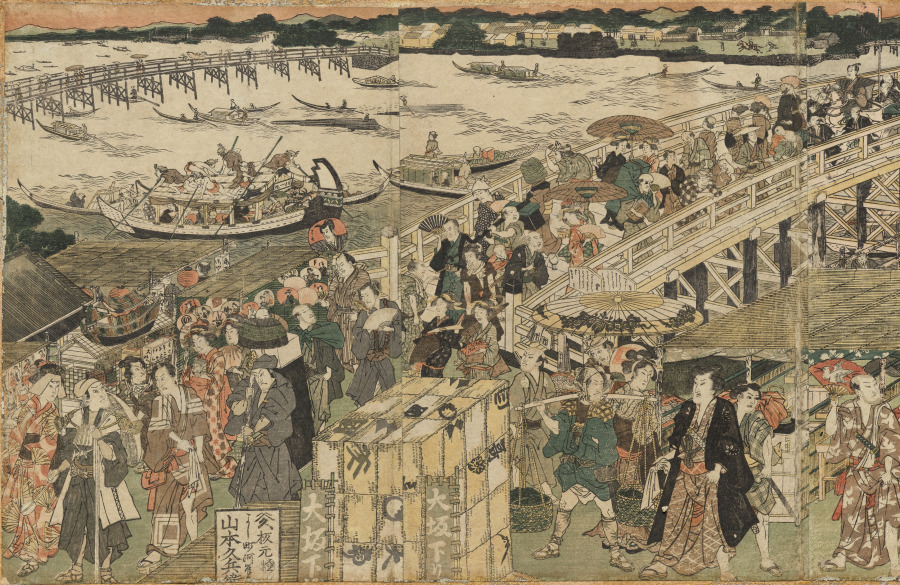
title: Cooling Off at Ryōgoku Bridge in Edo, a Pentaptych (Edo Ryôgoku suzumi no zu, gomai tsuzuki)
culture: Japan, Edo period (1615–1868)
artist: Utagawa Toyokuni (Japanese, 1769–1825)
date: 1811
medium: Pentaptych of color woodblock prints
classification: Print